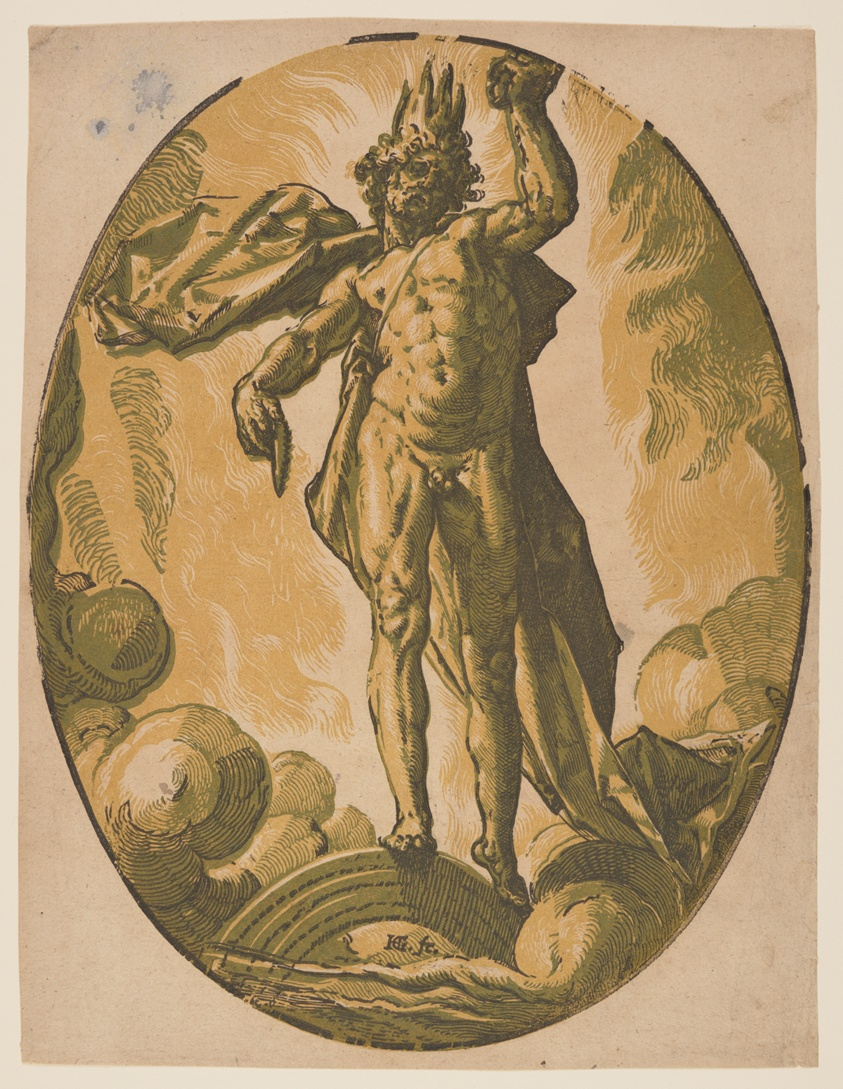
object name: Print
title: Helios, from The Deities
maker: Hendrick Goltzius (Dutch, 1558–1617)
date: 1588/90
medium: Chiaroscuro woodcut from three blocks in yellow and green on ivory laid paper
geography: Netherlands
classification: print; paper; prints and drawing; woodcut